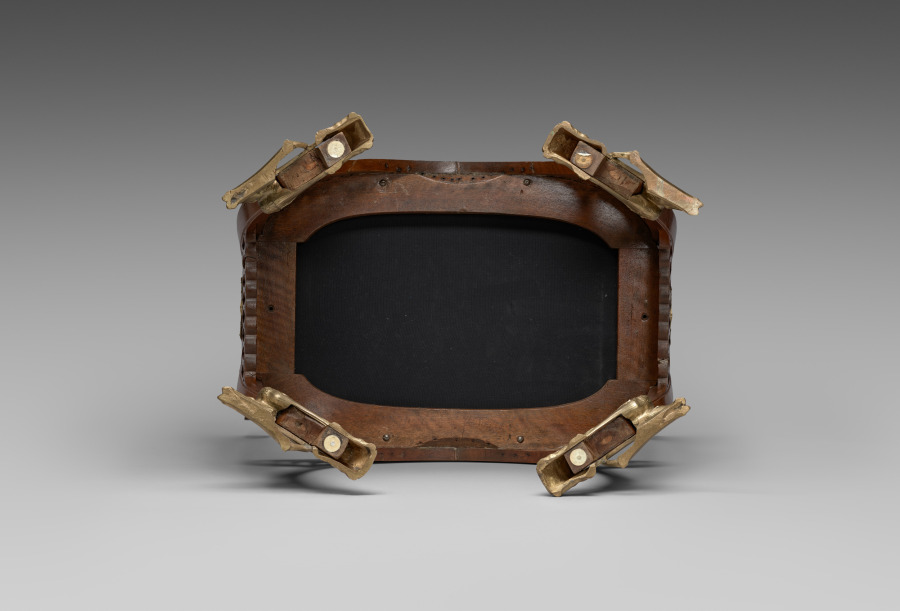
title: Tabouret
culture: France, Paris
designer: Carlo Bugatti (Italian, 1856–1940)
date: c. 1907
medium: Mahogany, parchment, gilt bronze, mother-of-pearl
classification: Furniture and woodwork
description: Although this tabouret is undocumented, its design, with its interlaced ovoid forms, gilt cast metal mounts, and mother-of-pearl inlays, is so close in style to the Cleveland Museum of Art’s celebrated tea table (1991.45) that it too can be assigned to Bugatti's Parisian period and dated about 1907.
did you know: Carlo Bugatti's son Ettore founded the luxurious car company Bugatti Automobiles.